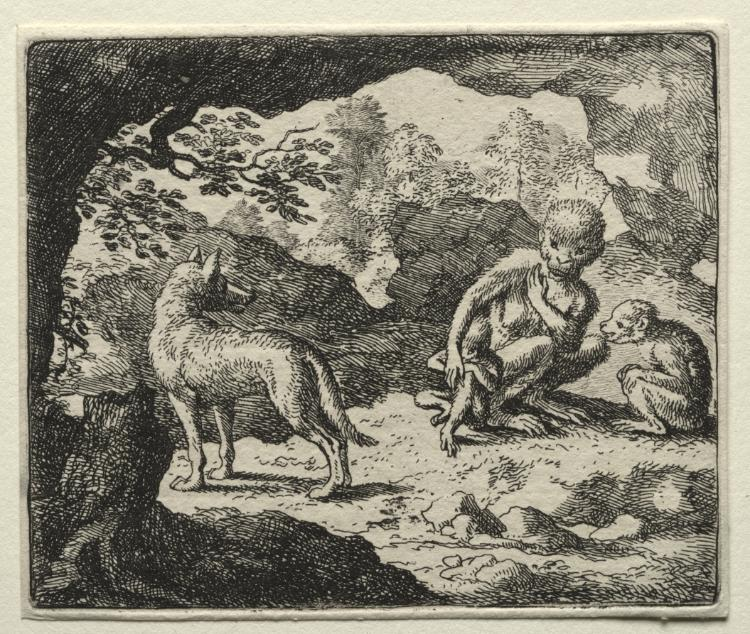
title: Reynard the Fox: The Wolf in the Monkey's Den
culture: Netherlands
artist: Allart van Everdingen (Dutch, 1621–1675)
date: 1650–75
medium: etching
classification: Print